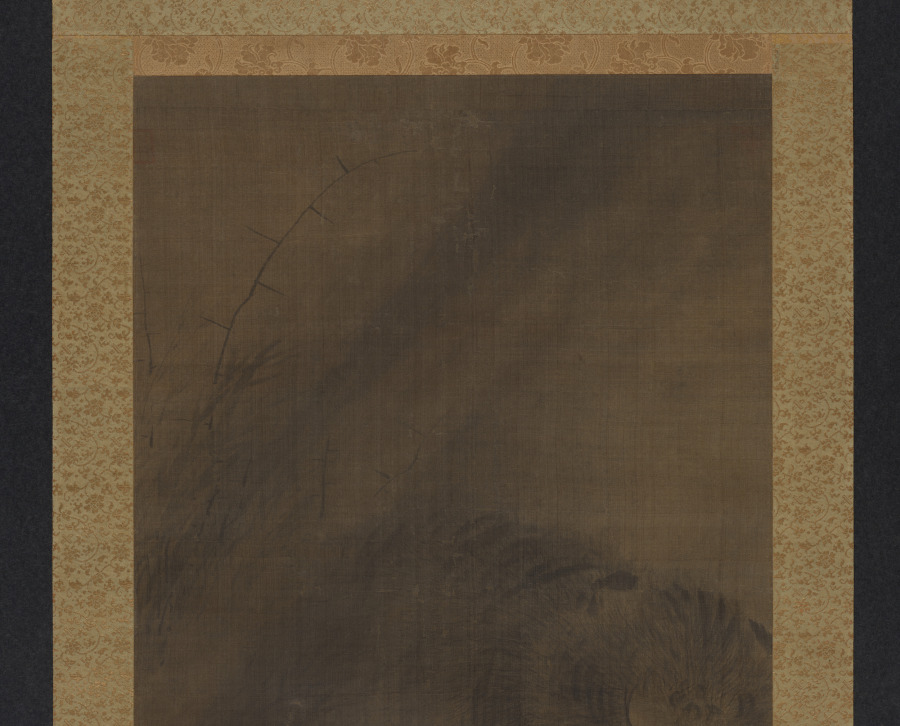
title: Tiger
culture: China, Southern Song dynasty (1127-1279)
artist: Fachang Muqi (Chinese, 1220–1280)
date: c. 1250–79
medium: Hanging scroll; ink and slight color on silk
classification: Painting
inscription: 道有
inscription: 雜華室印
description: The dragon and tiger are tied to the philosophical concept of yin and yang, which describes opposite but complementary forces. The dragon occupies a tiered background of waves and mist. Its luminous head emerges from the darker passages, and its narrow twisting body is serpent-like. By contrast, the close-up view of the tiger emphasizes its bulk. The tiger bends its head to lick its paw while its tail curls in the foreground. In their original Chan Buddhist context, this pair of scrolls likely flanked a central image, like the Bodhisattva Guanyin. The silk has darkened over the centuries, and the slight reddish shading in the tiger’s tongue and nose has faded.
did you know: Fachang Muqi's ink paintings, like this pair, were highly appreciated and collected in Japan.